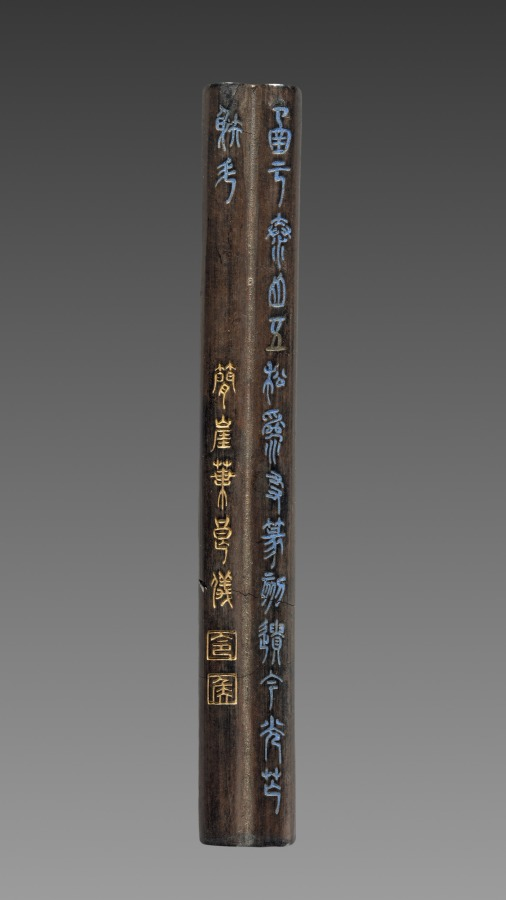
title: Ink Cake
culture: China, Qing dynasty (1644-1911)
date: late 19th Century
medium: ink cake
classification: Miscellaneous